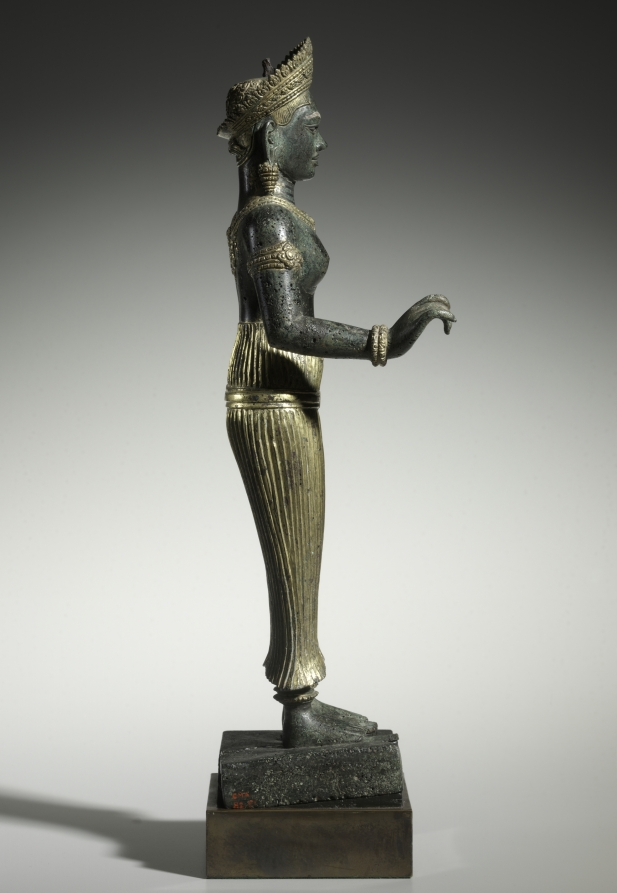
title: Royal Female Figure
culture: Cambodia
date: late 1000s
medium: partially gilt bronze and silver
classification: Sculpture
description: The identity of this figure is uncertain, since the objects she held are missing, and no other related sculptures have been located. Since she has only two arms and wears a crown, she is probably a royal woman. Semiprecious stones or metals, such as onyx or silver, would have been inlaid into her eyes and eyebrows, further enlivening her image. The gilded adornments are set off against her dark shining skin to dazzling effect. Most Cambodian stone sculptures have lost their gold jewelry, so this figure gives an accurate impression of how many would have looked when installed in their sanctuaries.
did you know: This royal female figure's eyebrows and pupils were originally inlaid with silver or semiprecious stones.